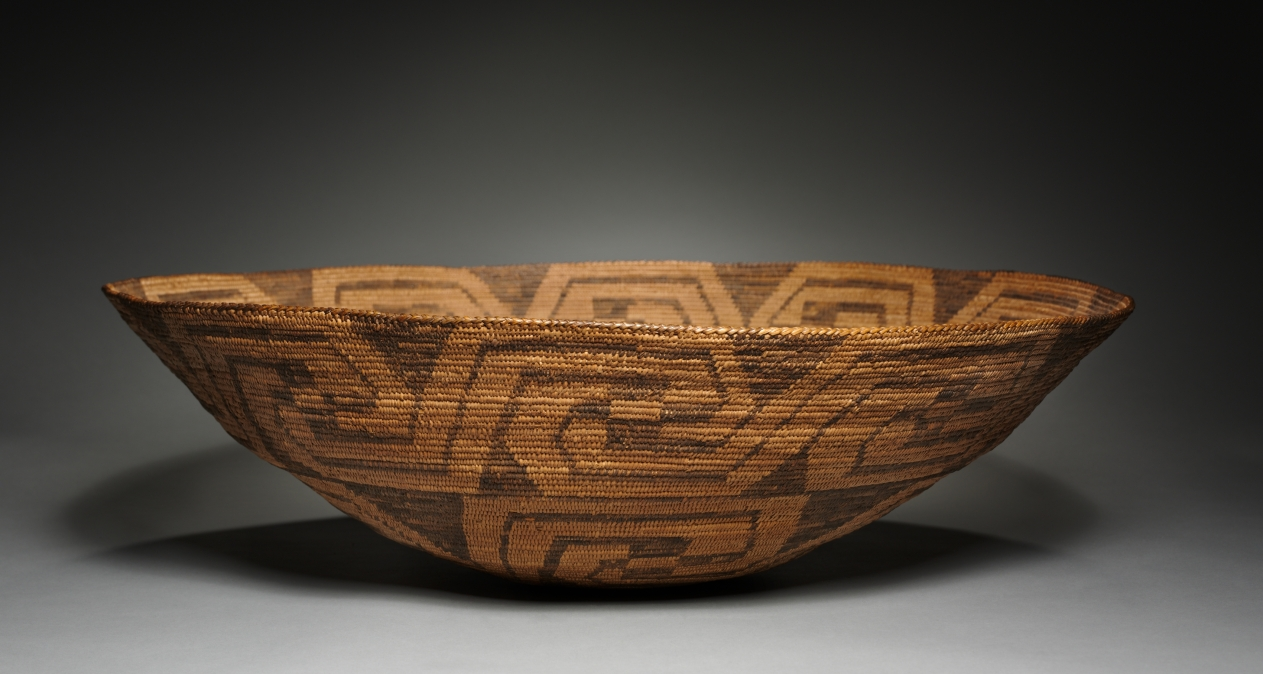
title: Tray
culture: Akimel O'odham (Pima), 20th century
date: before 1929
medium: coiled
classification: Basketry